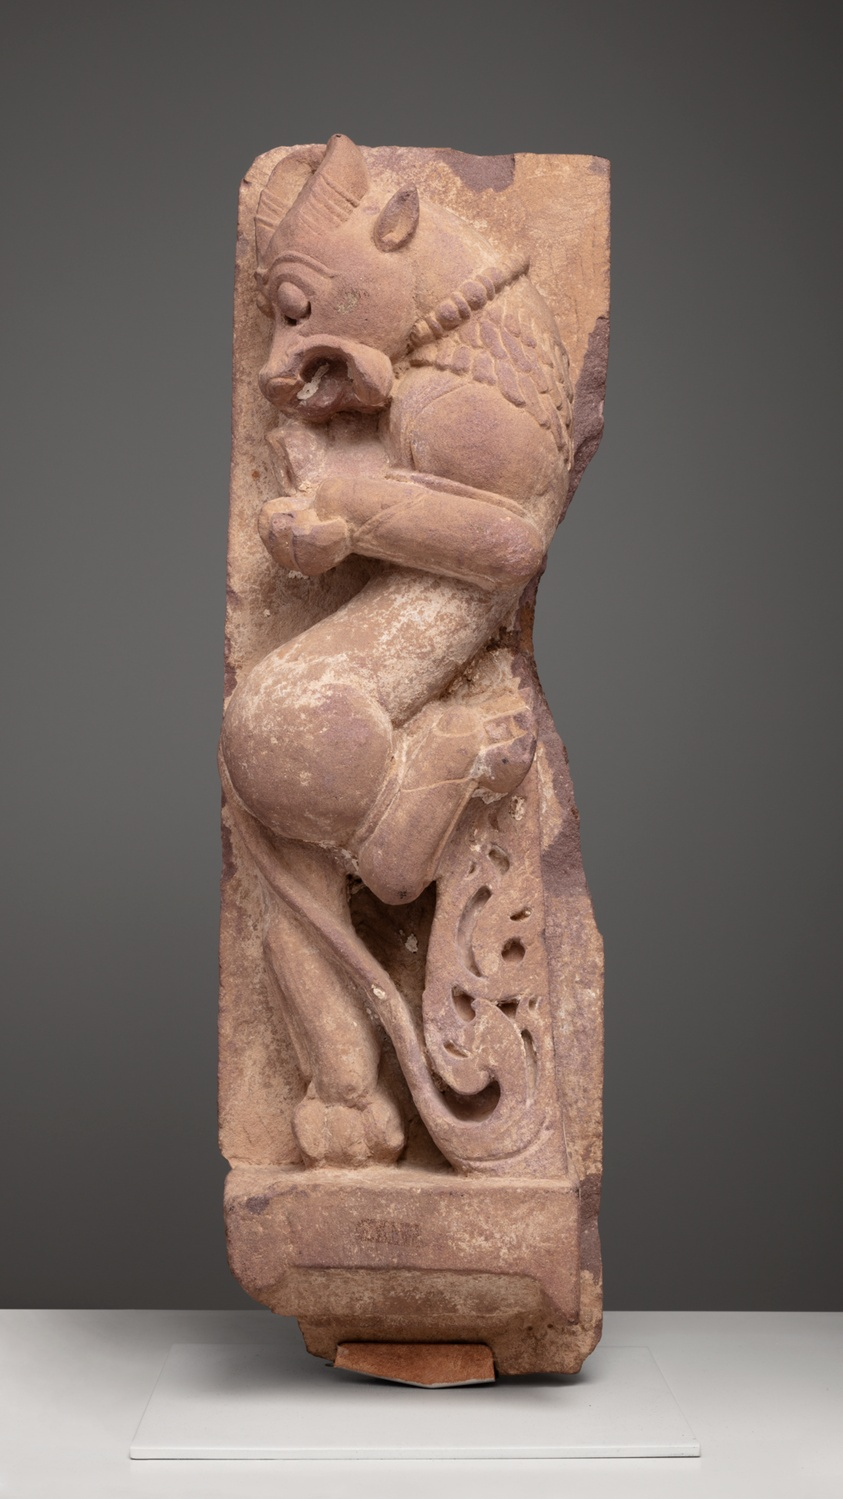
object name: Architectural fragment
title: Rampant Mythical Lions (Vyala)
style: South Asian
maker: India; Madhya Pradesh or Rajasthan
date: 8th/9th century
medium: Sandstone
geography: India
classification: sandstone; stone; sculpture; asian art; architectural fragment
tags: animals